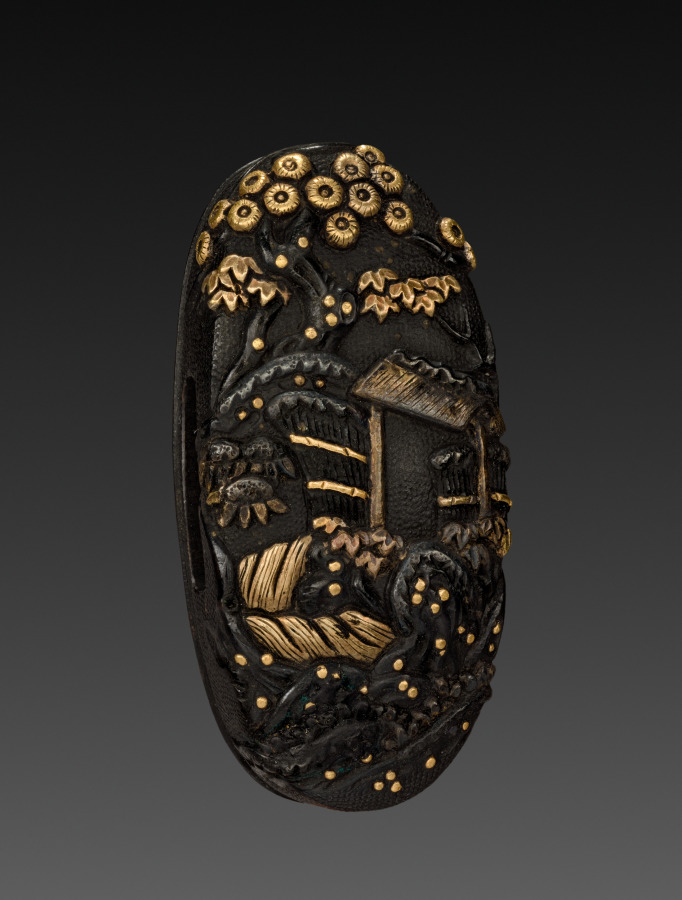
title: Sword-Hilt Pommel (Kashira)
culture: Japan, Edo period (1615–1868)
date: 1700–1850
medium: shakudo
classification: Arms and Armor